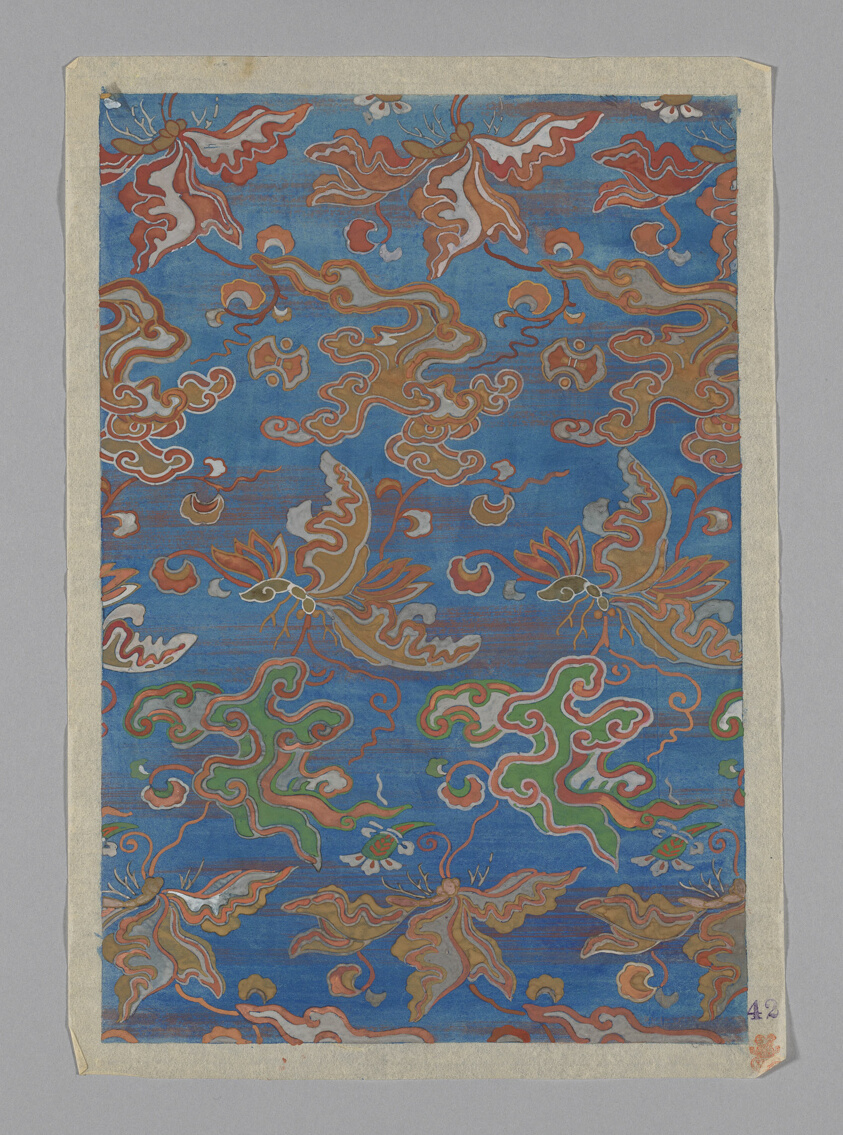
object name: Drawing and Watercolor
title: Design on Paper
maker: Japan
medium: Paper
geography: Japan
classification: textile; accessory - paper design; watercolor; paper